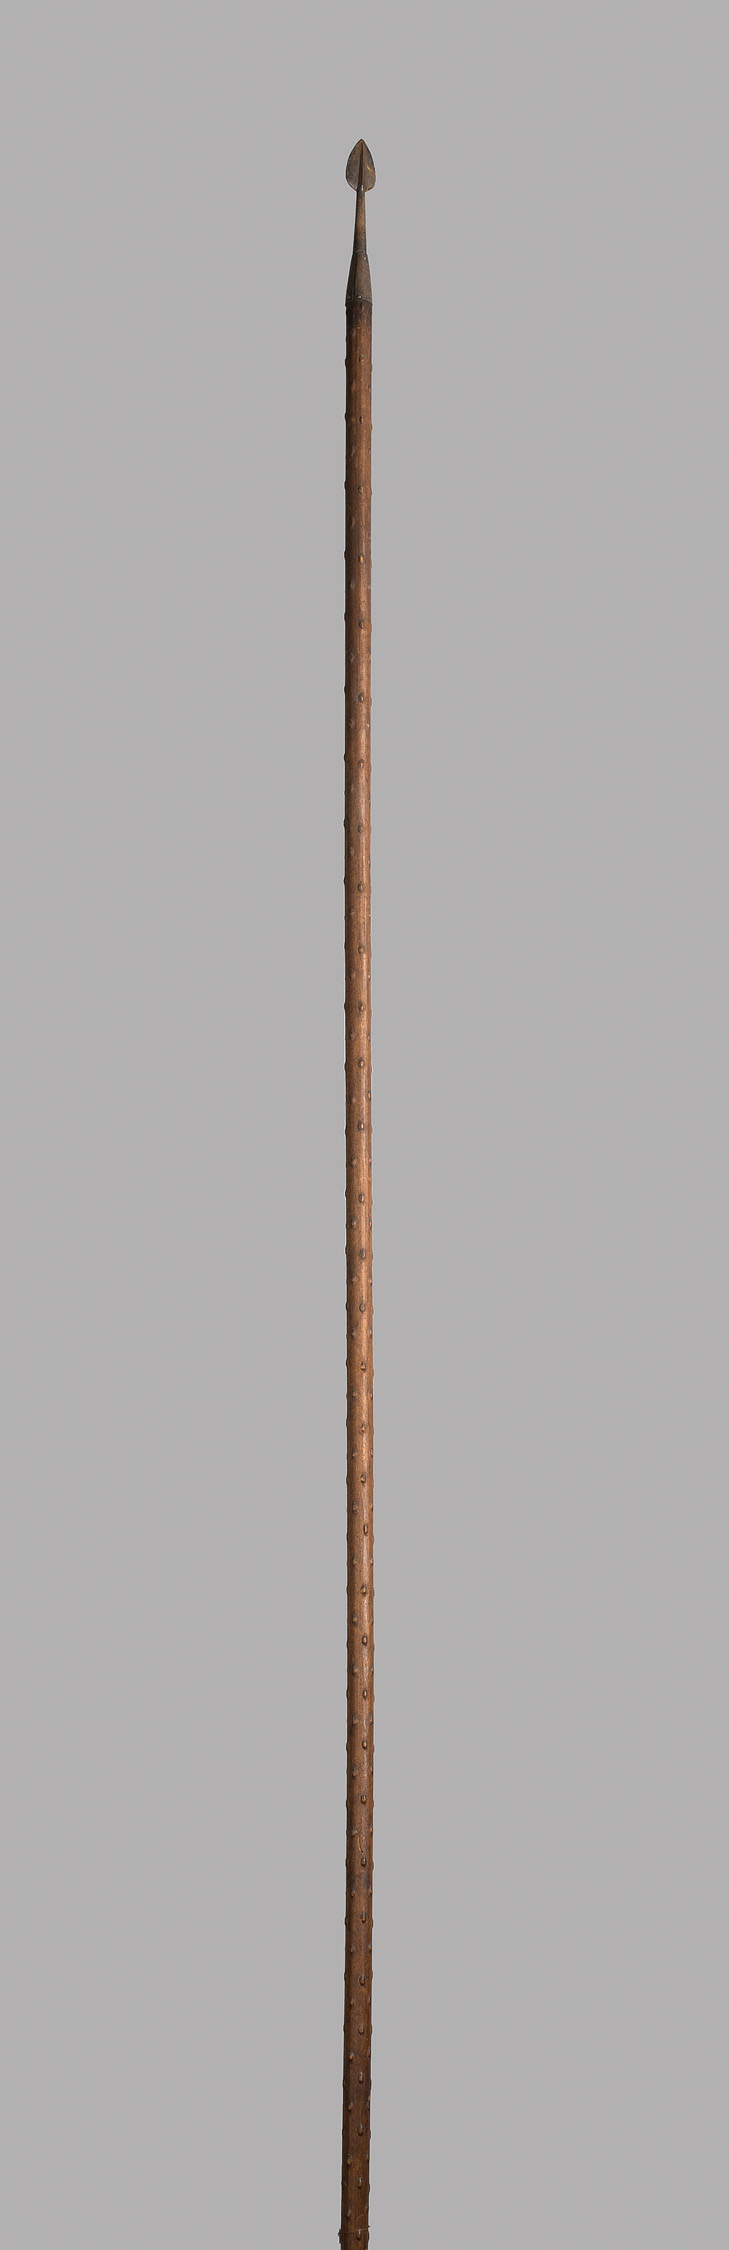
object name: Arms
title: Infantry Pike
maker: European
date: 19th century in 17th century style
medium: Wood and steel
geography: Europe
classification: edged weapon-staff; arms; arms and armor